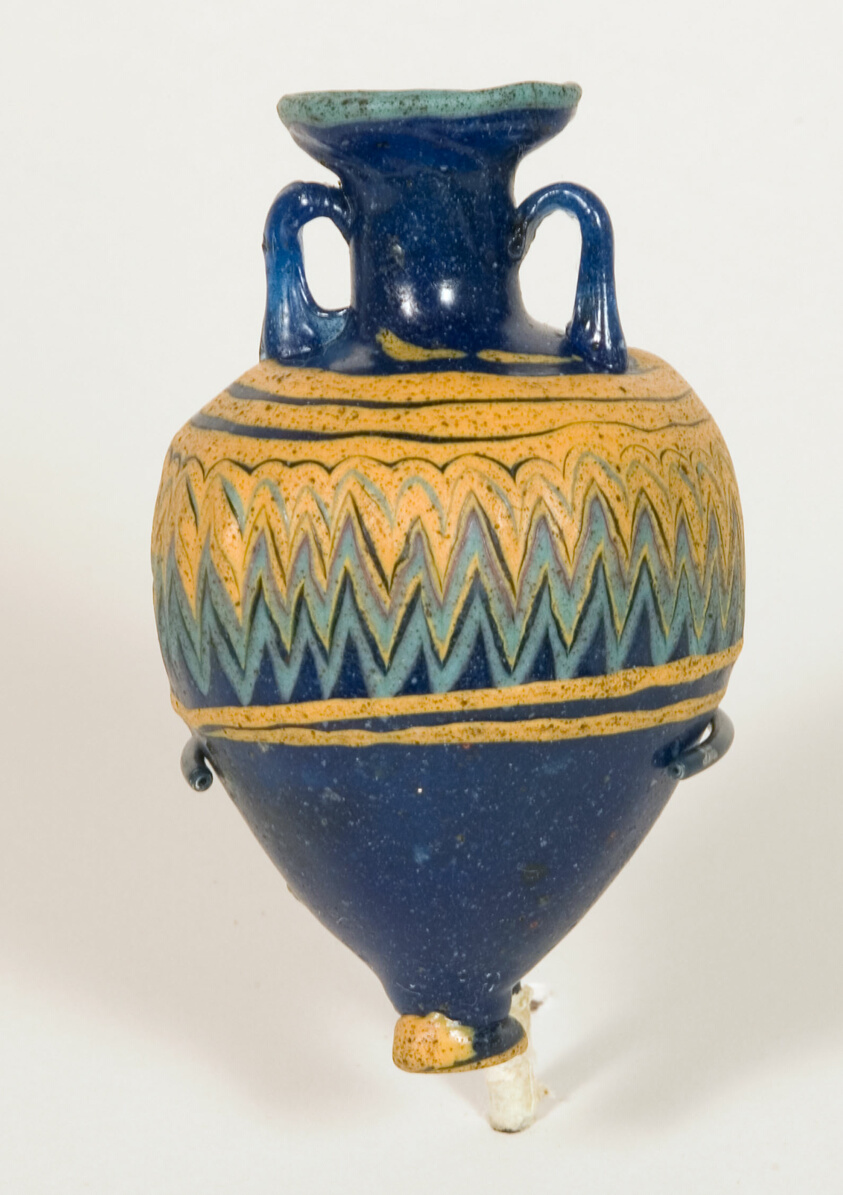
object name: Vessel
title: Amphoriskos (Container for Oil)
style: late period (egyptian)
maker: Eastern Mediterranean, possibly from Rhodes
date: late 6th-early 5th century BCE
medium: Glass, core-formed technique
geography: Eastern Mediterranean Region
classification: container; amphoriskos; glass; vessel; ancient art